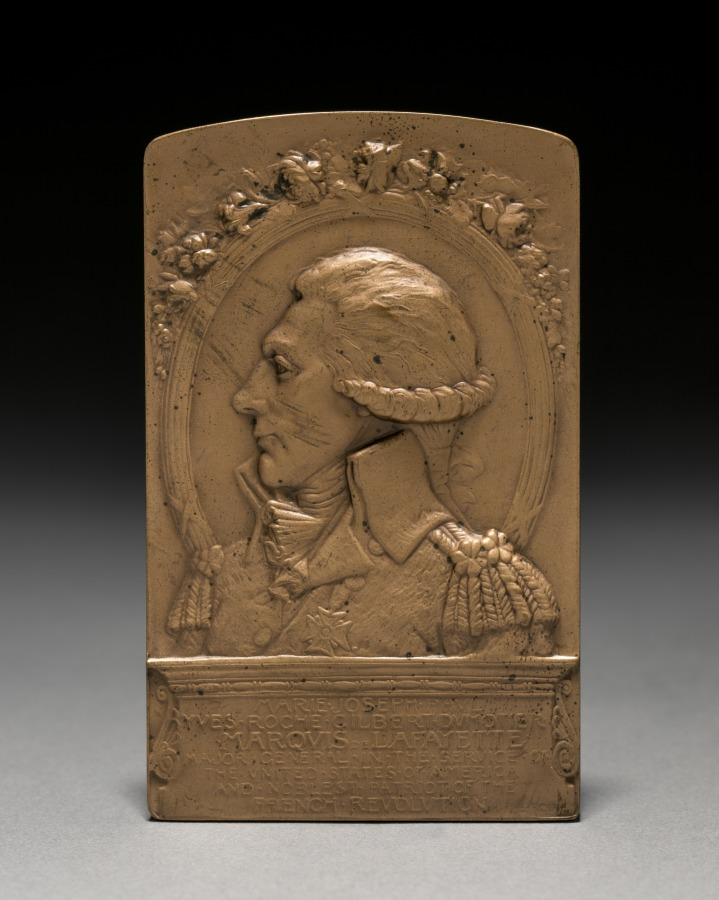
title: Medal: Lafayette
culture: France, 20th century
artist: Jules Edouard Roiné (French, 1857–1916)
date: 1911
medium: bronze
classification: Metalwork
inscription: below: "MARIE JOSEPH PAUL/ YVES. ROCHE. GILBERT. DVMOTIER/ MARQVIS DE LAFAYETTE/ MAJOR GENERAL IN THE SERVICE OF/ THE VNITED STATES OF AMERICA/ AND NOBLEST PATRIOT OF THE/ FRENCH REVOLVTION."